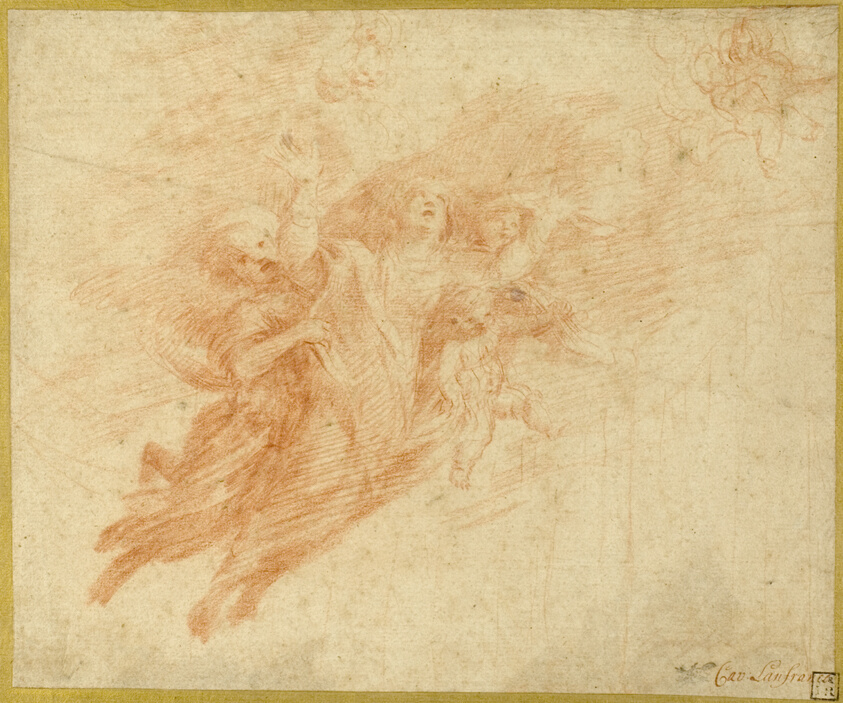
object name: Drawing and Watercolor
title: Ascension of the Magdalene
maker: Unknown Italian artist; possibly Style of Cecco Bravo (Italian, 1607-1661); possibly Giovanni Lanfranco (Italian, 1582-1647)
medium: Red chalk, on buff laid paper, laid down on card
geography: Italy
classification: drawings (visual works); prints and drawing